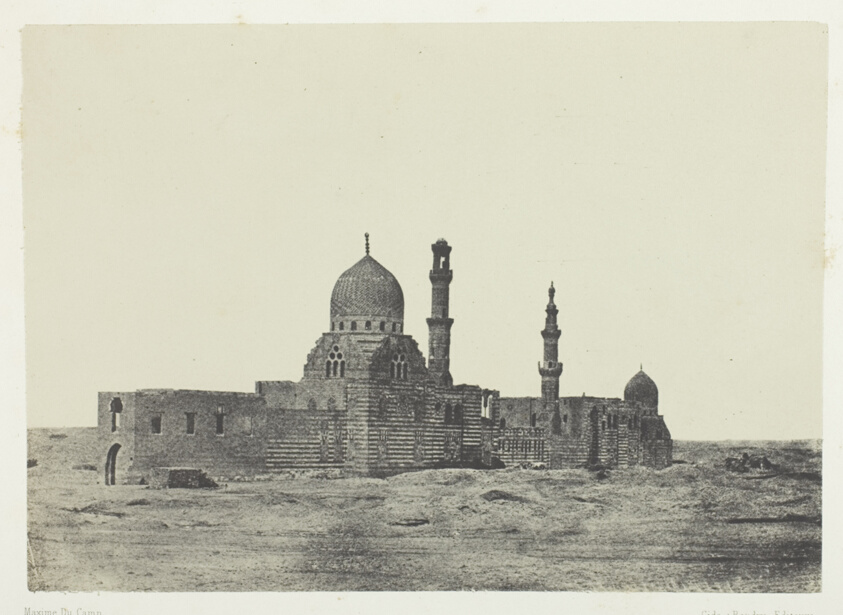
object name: Photograph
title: Mosquée et Tombeau des Ayoubites, Le Kaire, plate 6 from the album "Egypte, Nubie, Palestine et Syrie" (1852)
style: 19th century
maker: Maxime Du Camp (French, 1822–1894)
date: 1849/51, printed 1852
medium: Salted paper print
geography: France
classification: salted paper print; photographic process; photography; photograph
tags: Collected by Hugh Edwards, Egypte, Nubie, Palestine et Syrie